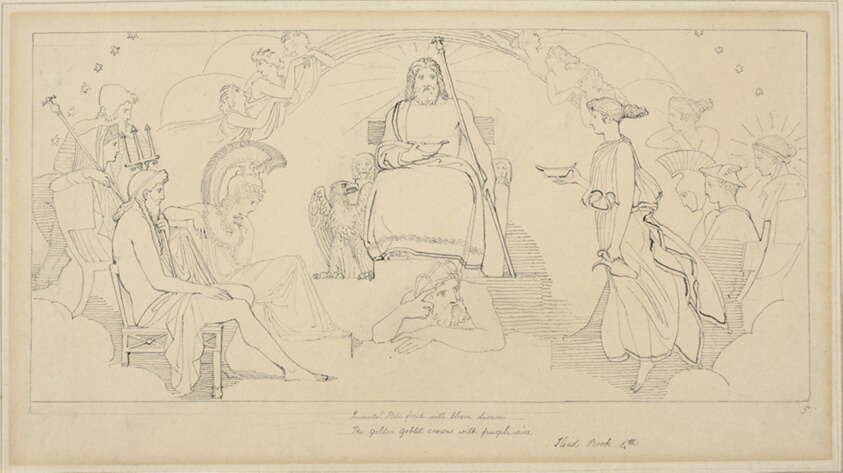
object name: Drawing and Watercolor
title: The Council of the Gods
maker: John Flaxman, II; English, 1755-1826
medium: Pen and gray ink, over graphite, on cream wove paper, laid down on ivory wove paper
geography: England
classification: pen and ink drawings; drawings (visual works); prints and drawing